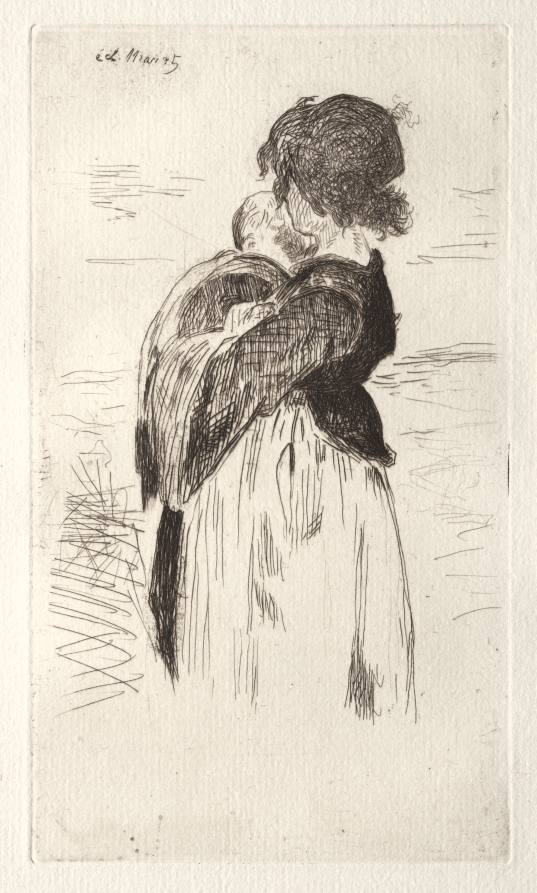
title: La petite fille tenant un bébé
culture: France, 19th century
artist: Édouard Manet (French, 1832–1883)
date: 1862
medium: etching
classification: Print